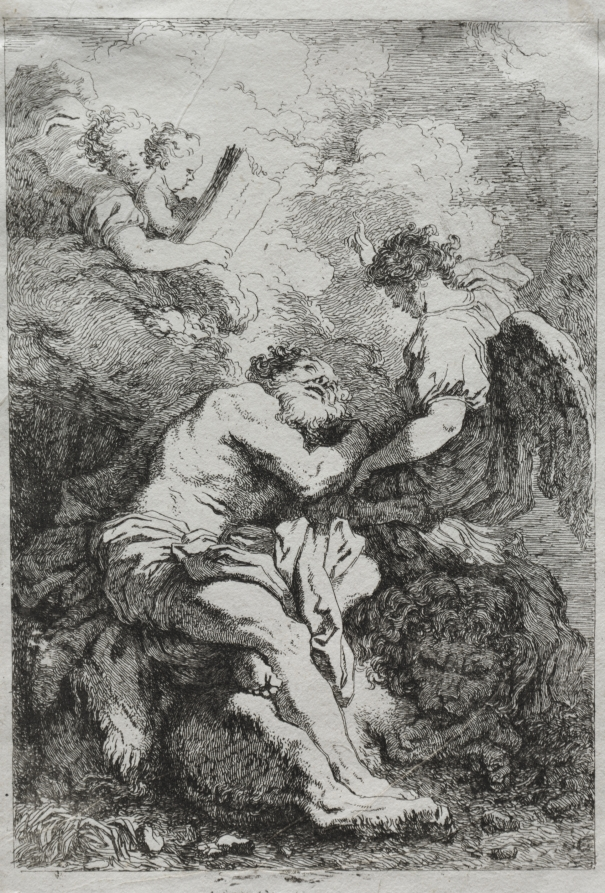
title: Saint Jerome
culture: France, 18th century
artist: Jean-Honoré Fragonard (French, 1732–1806)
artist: after Johann Liss (German, c. 1597–1631)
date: 1763–64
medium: etching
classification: Print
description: Religious scenes are unusual during a century more interested in carefree themes. The prosperous bourgeoisie demanded works with decorative appeal for their homes-pictures of readily comprehensible subjects based on popular literature or theater and rendered with a light, colorful palette.